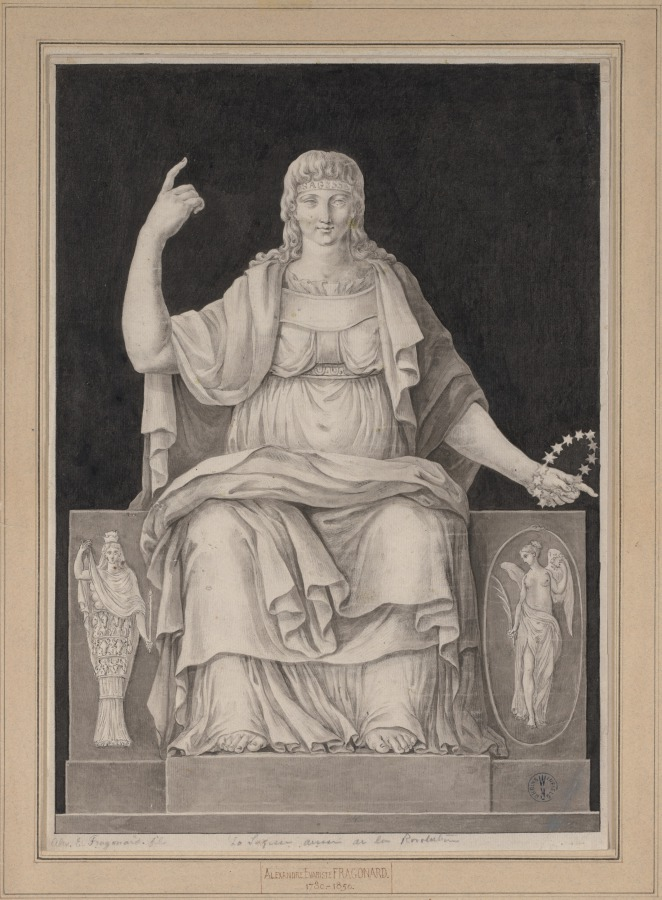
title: La Sagesse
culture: France, 19th century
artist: Alexandre-Evariste Fragonard (French, 1781–1850)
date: late 18th- early 19th century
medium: Graphite, pen and black ink, and gray and black washes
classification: Drawing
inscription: lower left corner, in graphite: Alex E. Fragonard, fils; lower center, in graphite: La Sagesse dessin de la Revolution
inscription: tertiary support: lower center, in brown ink: Alexandre Evariste FRAGONARD. / 1780.-1850.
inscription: verso of support: lower right corner, in graphite: R49588 / 791.30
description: Fragonard’s grisaille drawing portrays a sculpted personification of Wisdom, identified by the inscription “Sagesse” along her forehead. She is seated on a stone throne, decorated with two other female personifications on either side. Characterized as a righteous woman, Wisdom lifts her right arm in an authoritative gesture while clutching her traditional attribute, a crown of stars, in her other hand.